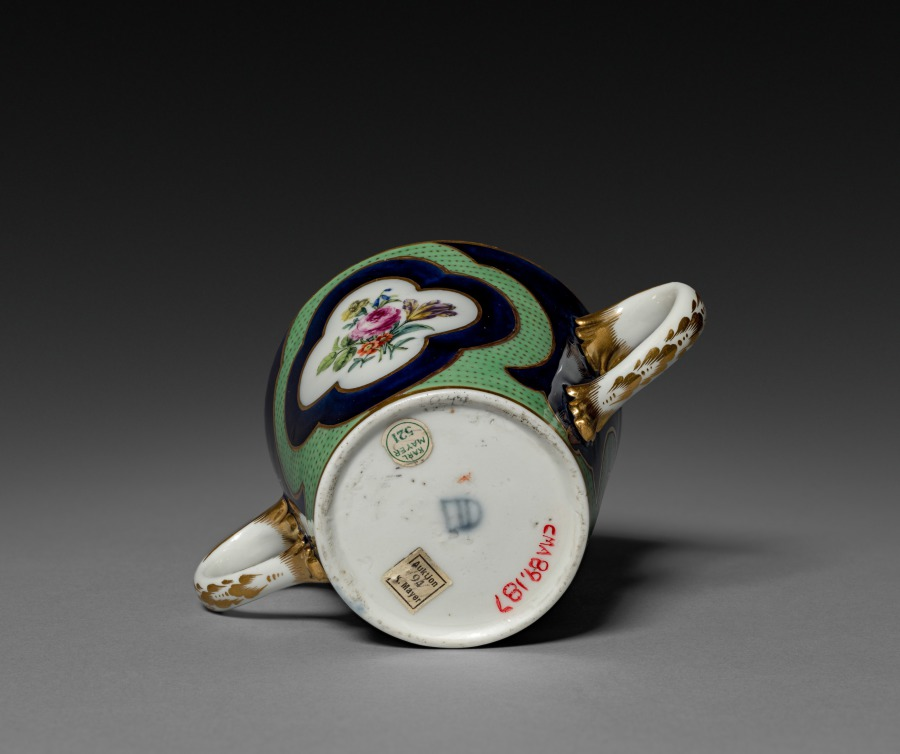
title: Two-Handled Cup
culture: Austria, Vienna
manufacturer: Du Paquier Porcelain Manufactory (Austrian, active 1719–1864)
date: c. 1780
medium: porcelain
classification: Ceramic